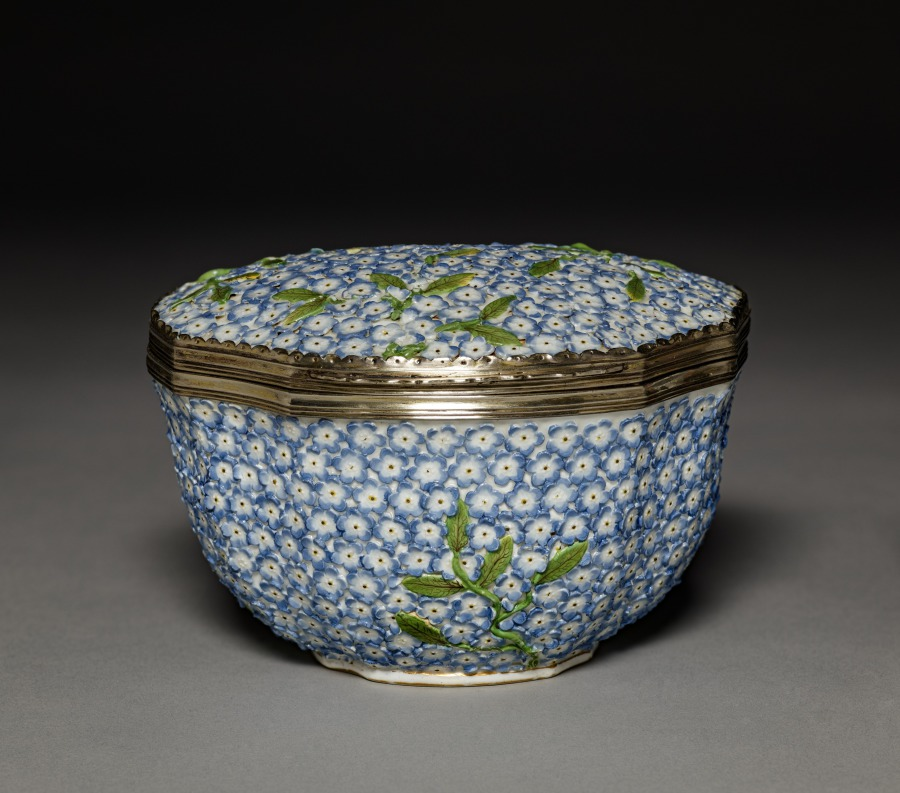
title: Covered Box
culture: Germany, Meissen, 18th century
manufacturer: Meissen Porcelain Factory (German, est. c. 1710)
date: c. 1750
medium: porcelain mounted in silver with traces of gilding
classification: Ceramic